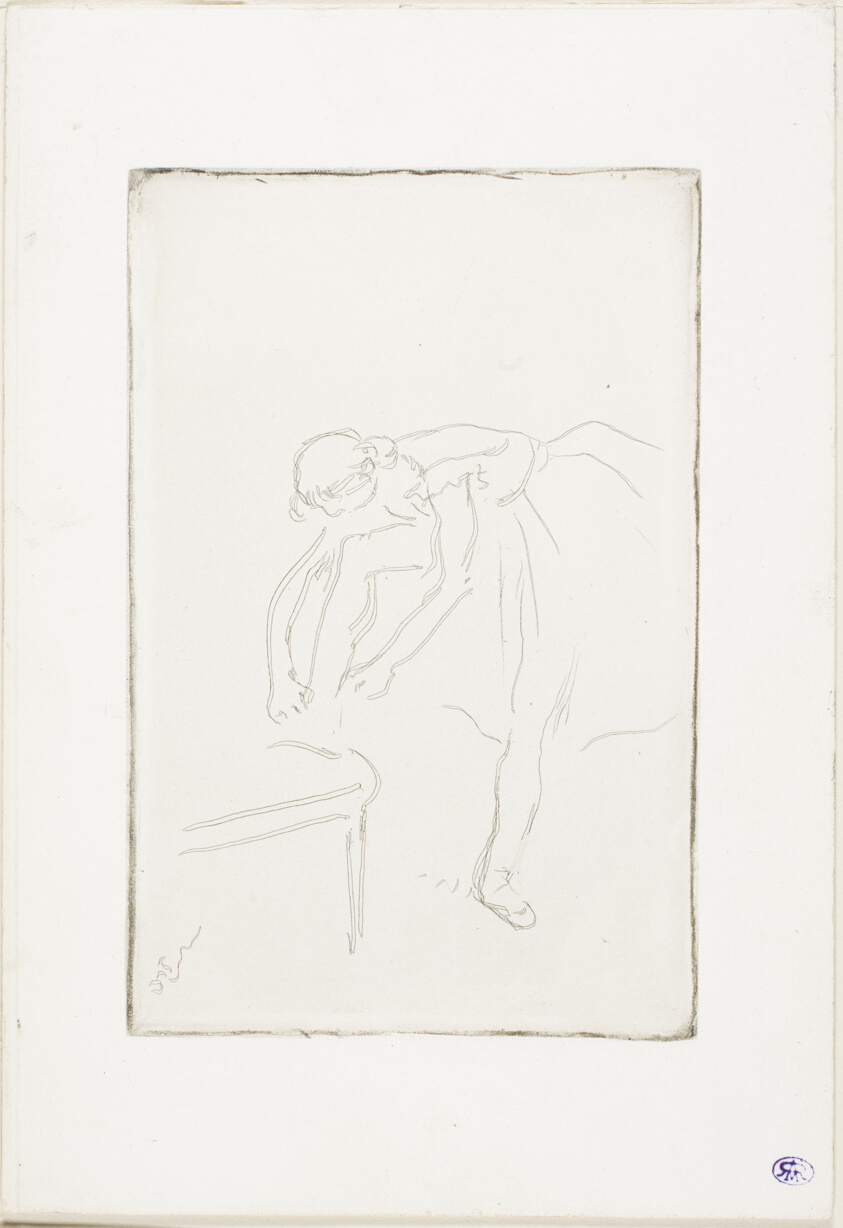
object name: Print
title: Dancer Putting on Her Shoe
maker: Edgar Degas; French, 1834-1917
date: c. 1888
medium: Etching on ivory wove paper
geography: France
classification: etching; print; prints and drawing; paper